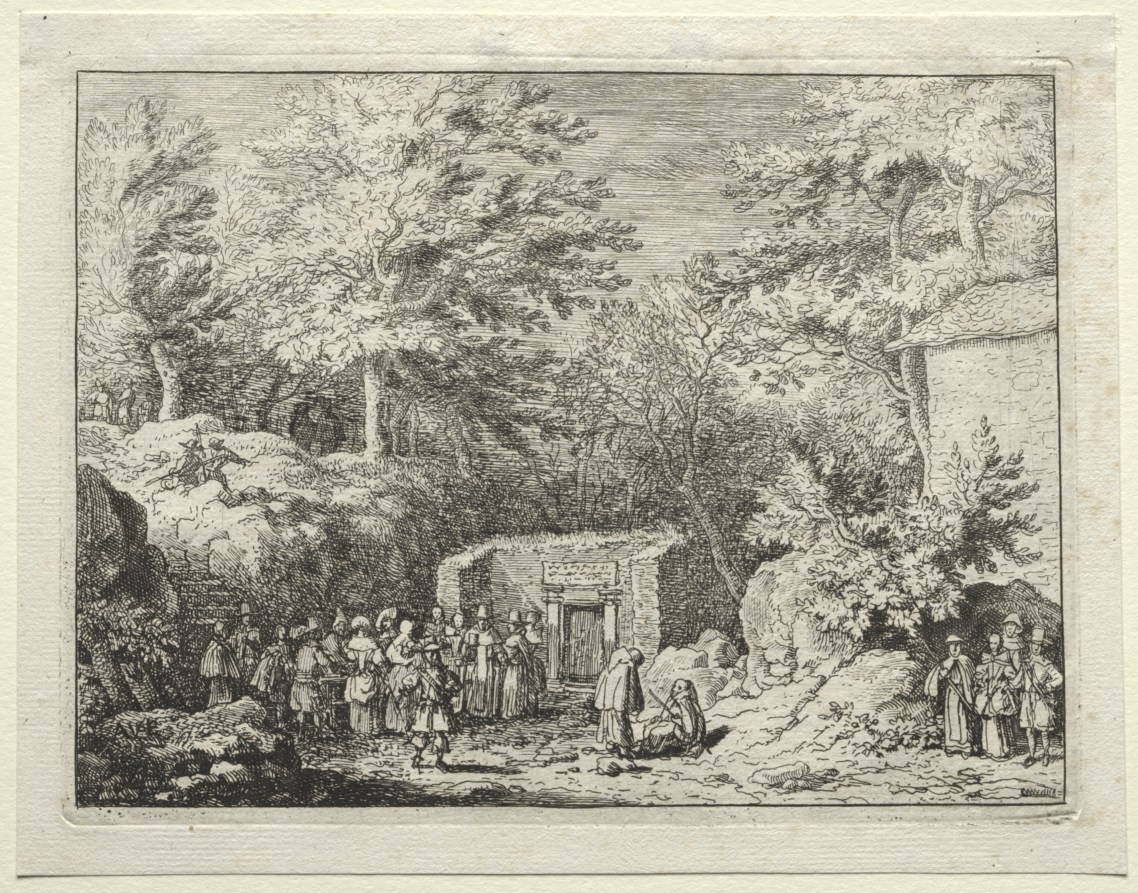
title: Four Springs in and around Spa: The Fourth Spring, The Spring at Sauvenière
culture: Netherlands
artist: Allart van Everdingen (Dutch, 1621–1675)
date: c. 1650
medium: etching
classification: Print